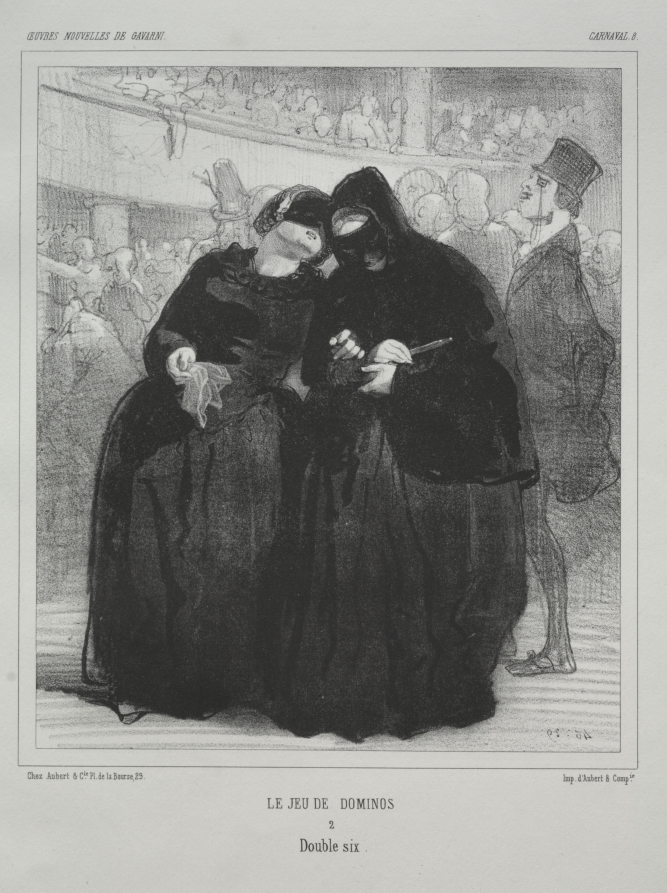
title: Carnaval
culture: France, 19th century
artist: Paul Gavarni (French, 1804–1866)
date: c. 1841–47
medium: lithograph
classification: Print